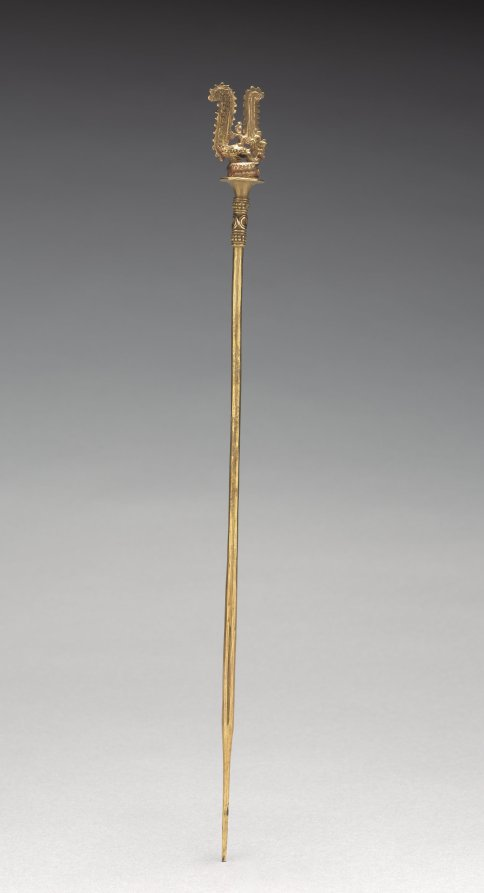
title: Lime Dipper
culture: Colombia, Calima region, Yotoco style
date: c. 1–800 CE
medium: gold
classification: Metalwork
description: Coca-leaf chewing was a widespread ritual in ancient South America. Utensils included a container and a dipper or spoon for powdered lime (made from seashells), added to the coca to enhance its gentle, stimulating effect. Colombian cultures are especially known for transforming these utensils into works of art made of precious metal. The image on the tallest dipper is wonderfully complex. A serpent coils at the bottom, beneath a snarling animal with a huge, vertical tail. This animal has a tiny monkey on its back; the monkey also has a huge tail, which rests on the first animal's head like a headdress. This intricate image was created with the lost-wax casting process.